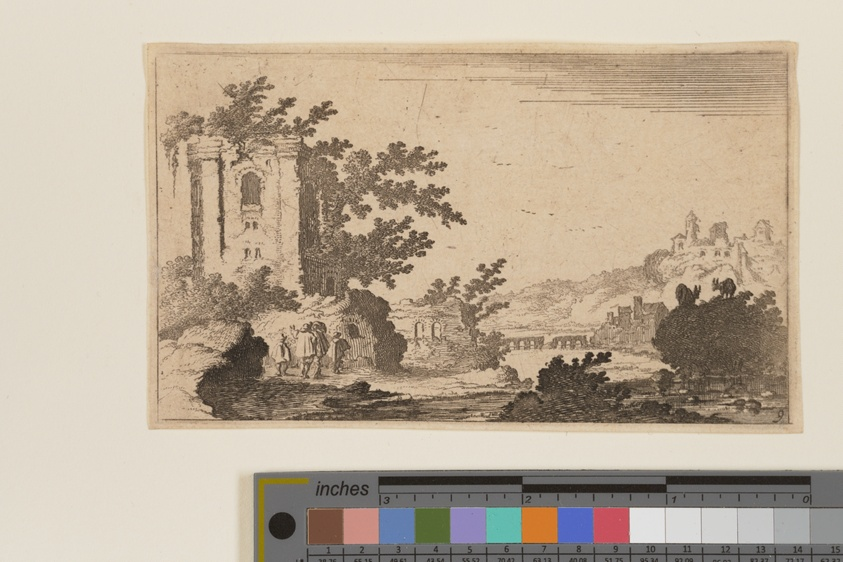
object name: Print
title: Ruins to Left of a River in Hilly Country, from Twelve Landscapes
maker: Gillis van Scheyndel (Dutch, 1595–1660)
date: c. 1605-1650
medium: Etching on ivory laid paper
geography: Netherlands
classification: etching; paper; print; prints and drawing